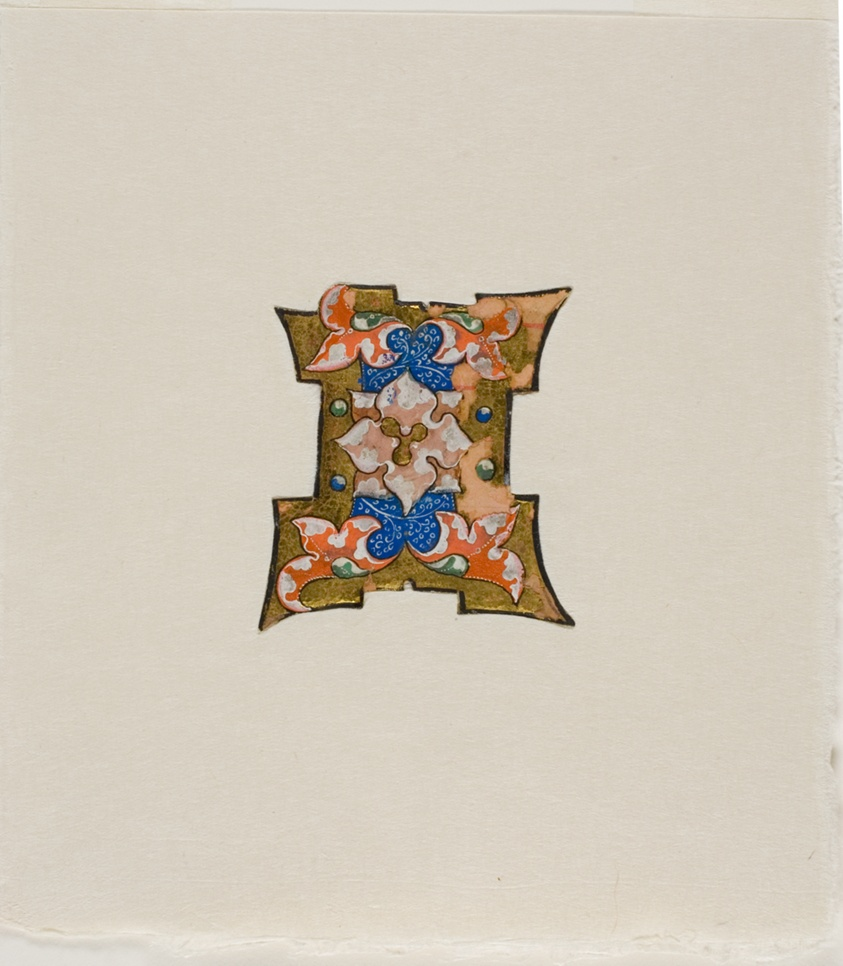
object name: Drawing and Watercolor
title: Decorated Initial "I" in Blue with Foliage and Four Balls, from a Choir Book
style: medieval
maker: European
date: 19th century imitation of 14th century style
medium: Manuscript cutting in tempera and gold leaf on vellum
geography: Europe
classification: tempera; manuscript; drawings (visual works); prints and drawing